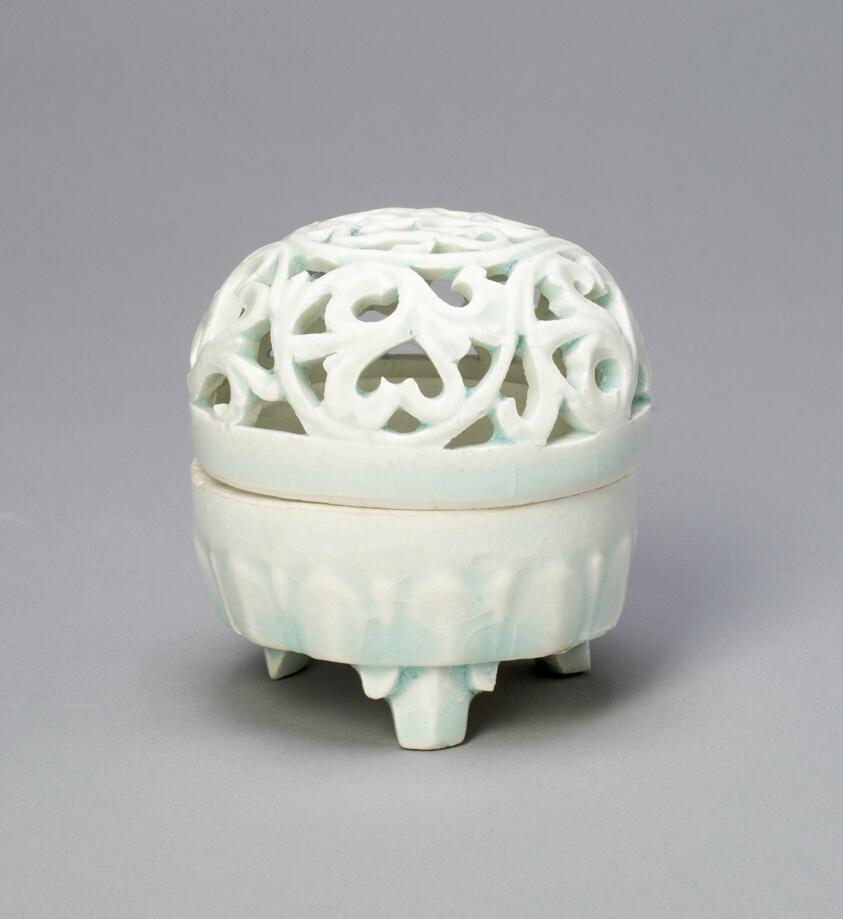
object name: Vessel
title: Covered Tripod Incense Burner (Censer) with Foliate Scrolls and Leafy Tendrils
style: Chinese (culture or style)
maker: China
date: Northern Song dynasty (960–1127)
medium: Qingbai ware; porcelain with openwork and underglaze molded decoration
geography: China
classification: porcelain; vessel